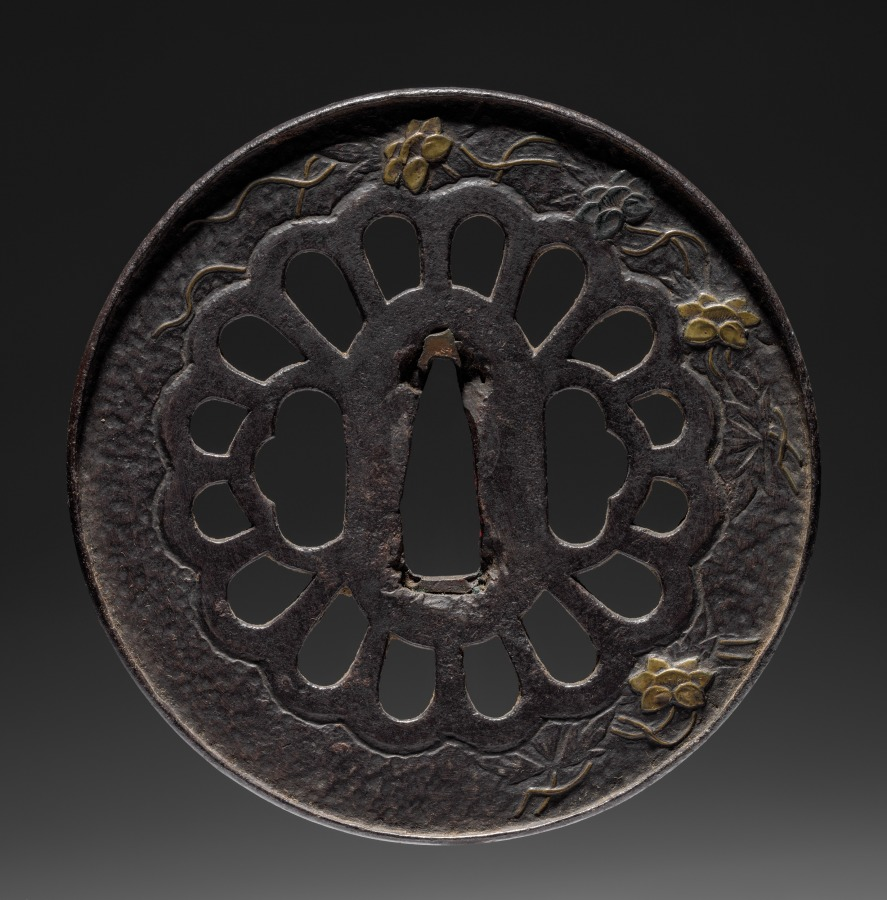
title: Sword Guard (Tsuba)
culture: Japan, possibly Edo period (1615-1868)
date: c. 1615–1868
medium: iron with brass inlay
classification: Arms and Armor